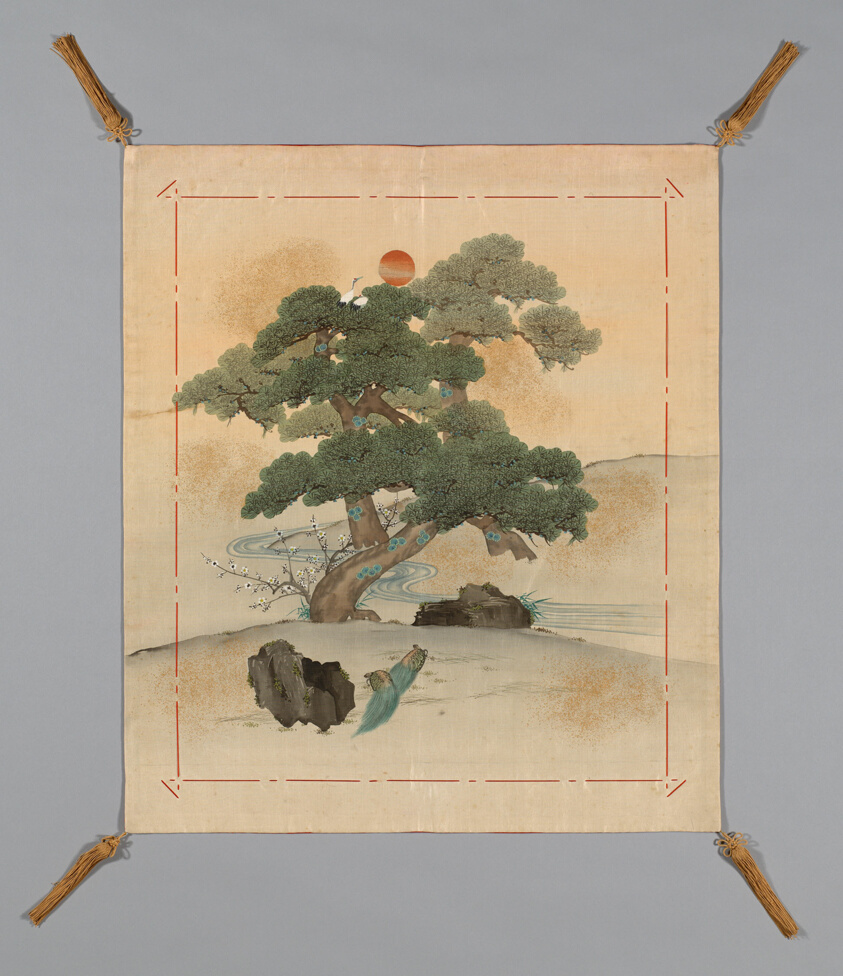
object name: Textile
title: Fukusa (Gift Cover)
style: meiji, Japanism, East Asian, asian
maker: Japan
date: early Meiji period (1868–1912), 1868/83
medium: Woven in one piece (hikikaeshi); Mon side: silk, twill weave self-patterned by areas of plain interlacing; dye extracted through stenciled chemical dye stripper (bassen), stenciled with dyes and gold leaf (yûzenzome;suri yûzenzome), painted with India ink (sumi) and dye details; embroidered with silk and gold-leaf-over-lacquered-paper-strip wrapped cotton, couching; Patterned side: silk, plain weave (shioze); stenciled (yûzenzome: suri yûzenzome and otoshizome) and painted India ink (sumi) and gold; embroidered with silk and gold-leaf-on-lacquered-paper-strip wrapped silk in straight stitches; laidwork and couching; silk, running "controlling" stitches along edges; corners: silk and cotton, wrapped and knotted re-piled fringe tassels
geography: Japan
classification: textile; weaving - printed